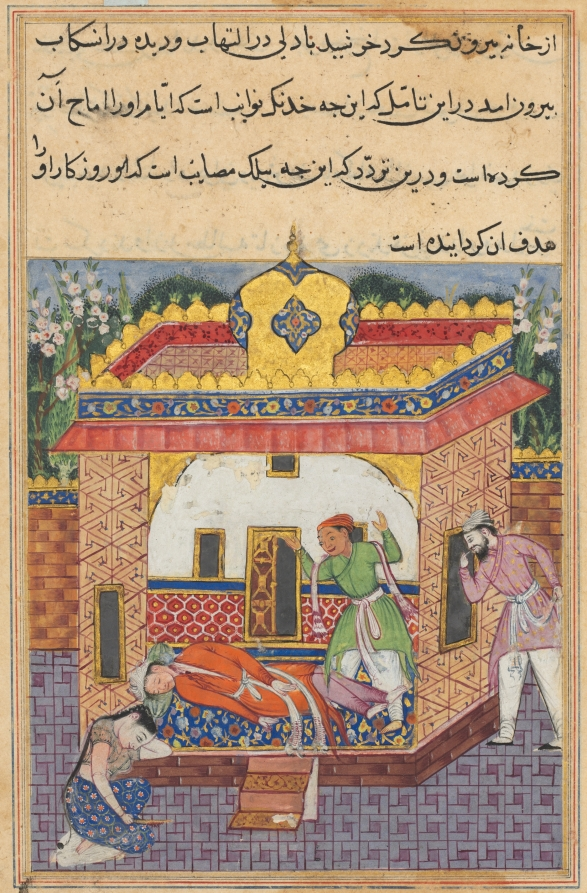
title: Latif, who has murdered his brother, falsely accuses Khurshid of the deed, from a Tuti-nama (Tales of a Parrot): Thirty-second Night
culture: Mughal India, court of Akbar (reigned 1556–1605)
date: c. 1560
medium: gum tempera, ink, and gold on paper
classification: Painting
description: Latif stands above his brother’s body with both hands raised in a gesture of astonishment. Khurshid kneels beside the bed listening to his accusations with resignation. In her hand, she holds the bloody knife that Latif placed there while she slept. On the right, an astonished man peers at the scene of the murder through an open window.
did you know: The next painting from this story is in the Edwin Binney 3rd Collection of the San Diego Museum of Art (1990.143).